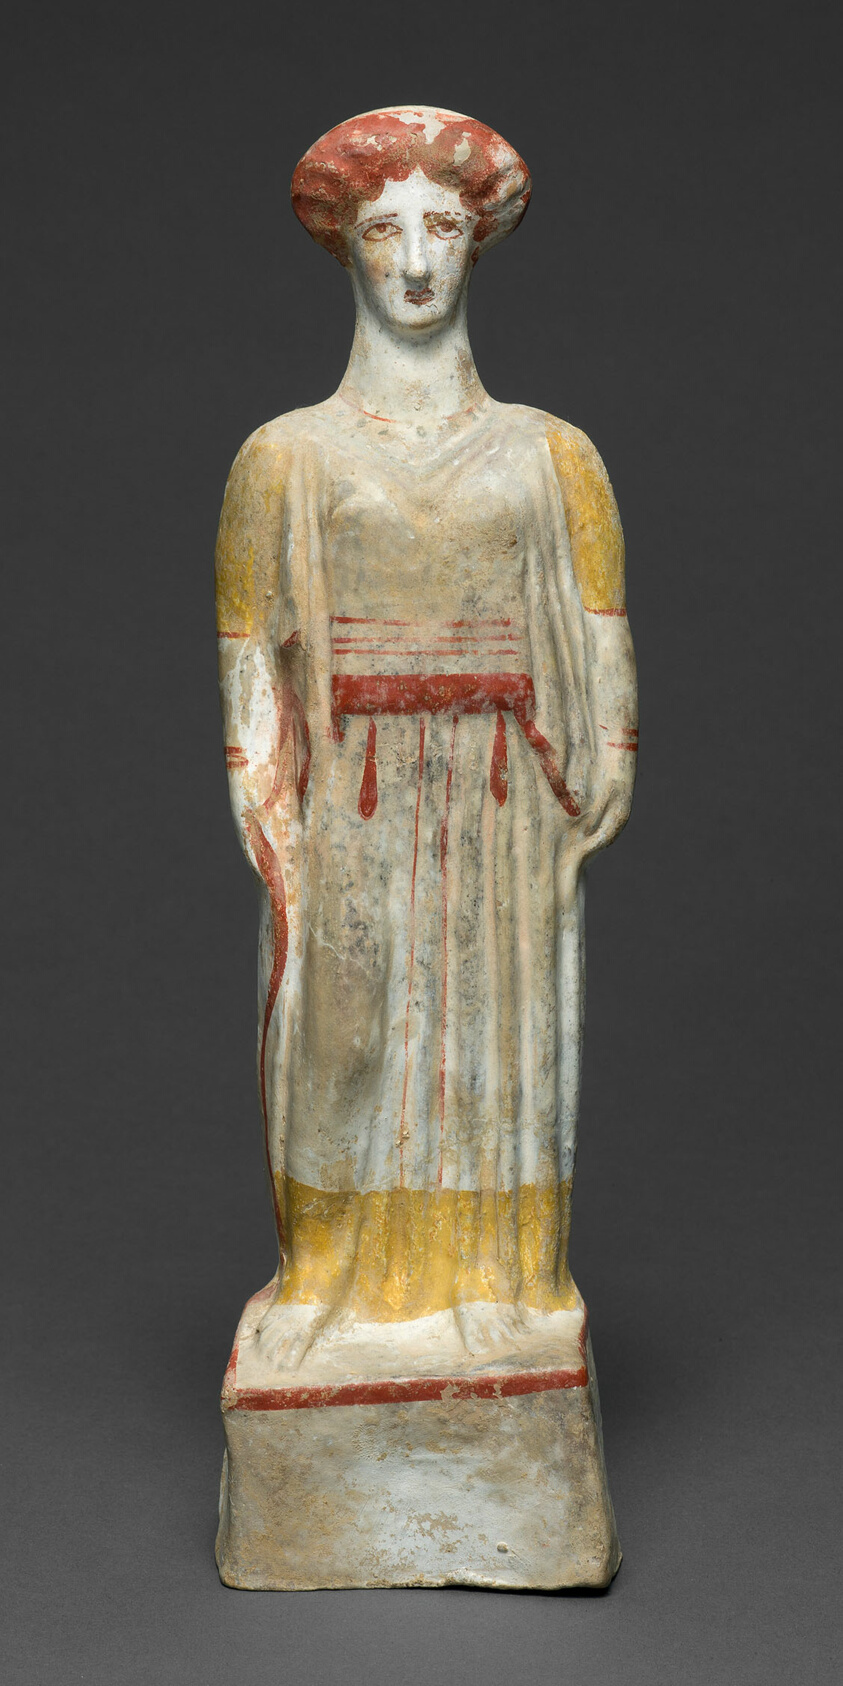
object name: Sculpture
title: Statuette of a Woman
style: greek, ancient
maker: Greek; Boeotia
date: about 450 BCE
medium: terracotta, polychromy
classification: statuette; sculpture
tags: woman, beauty, rituals